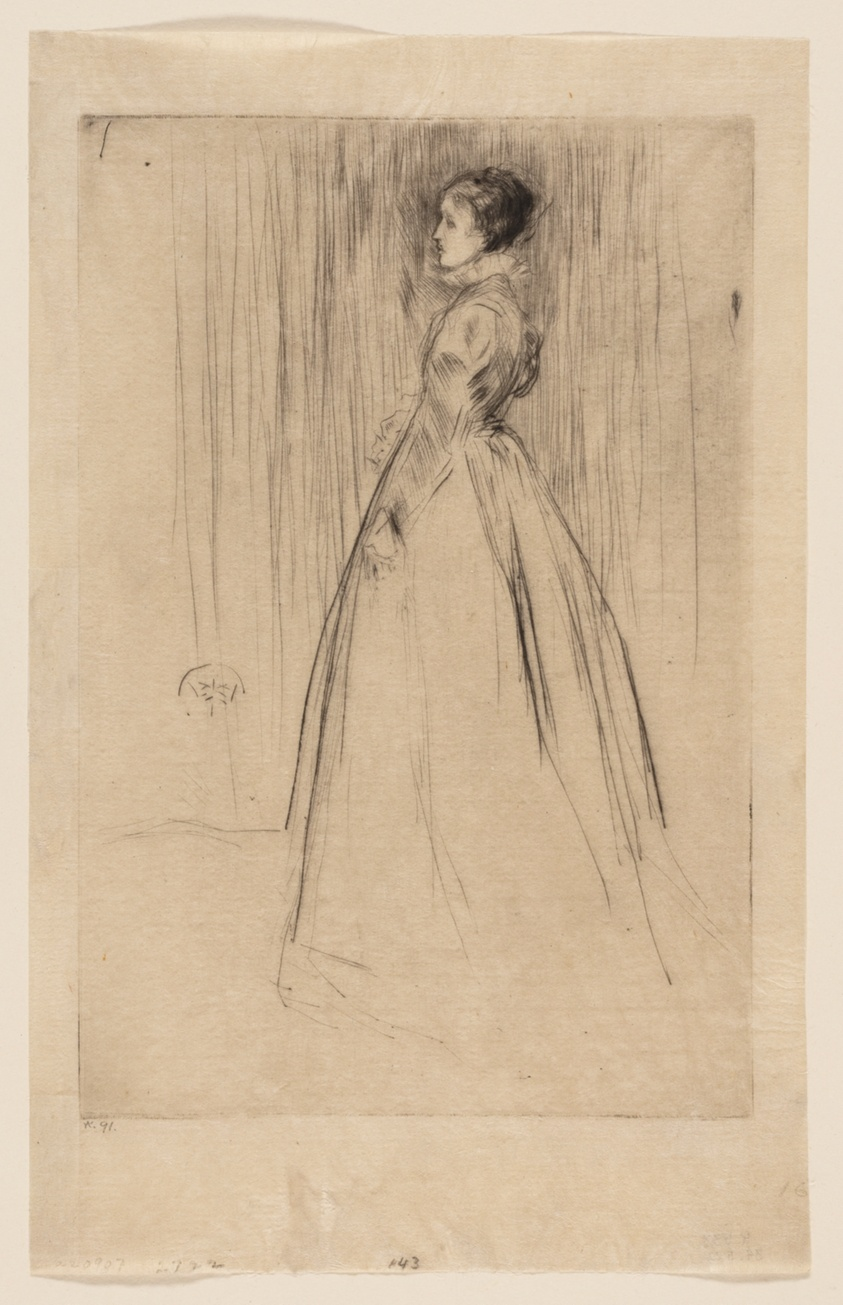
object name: Print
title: The Velvet Dress (Mrs Leyland)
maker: James McNeill Whistler (American, 1834-1903)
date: 1873/74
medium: Drypoint in black ink on cream Japanese paper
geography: United States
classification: drypoint; print; prints and drawing; paper